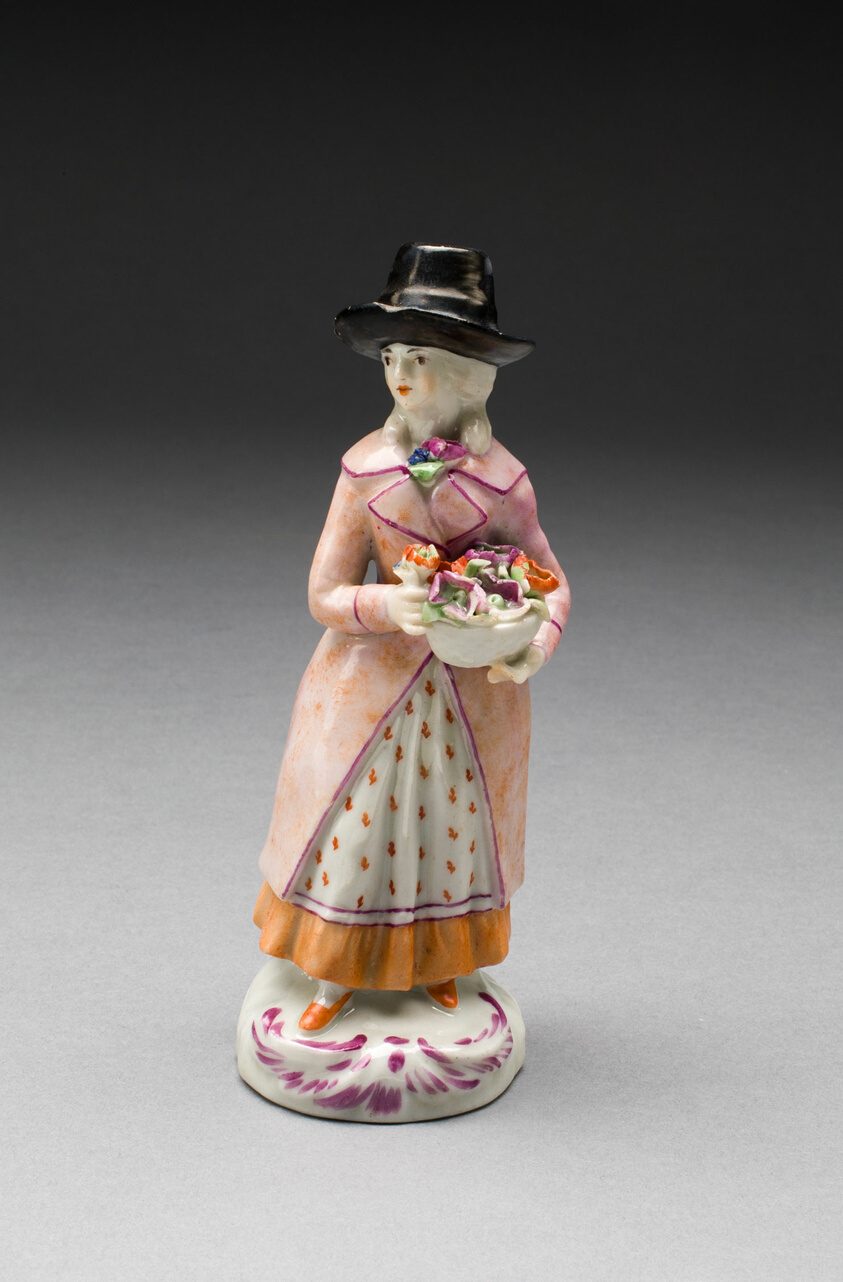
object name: Ceramics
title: Figure of a Girl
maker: Limbach Porcelain Factory (German, 1772-1944)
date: c. 1790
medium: Hard-paste porcelain, polychrome enamels, and gilding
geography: Limbach-Oberfrohna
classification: sculpture; porcelain; european decorative arts; ceramics